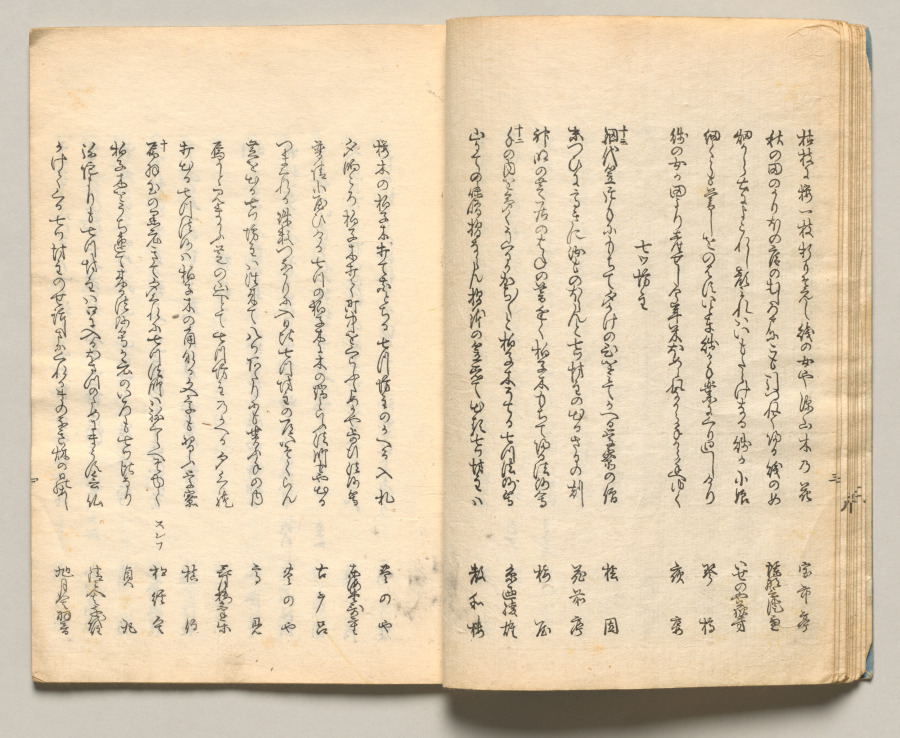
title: Spread Eleven from Volume Three of People of Japan in Light Verse (Kyōka)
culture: Japan, Edo period (1615–1868)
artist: Utagawa Hiroshige (Japanese, 1797–1858)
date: 1857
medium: Woodblock-printed book; ink and color on paper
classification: Bound Volume